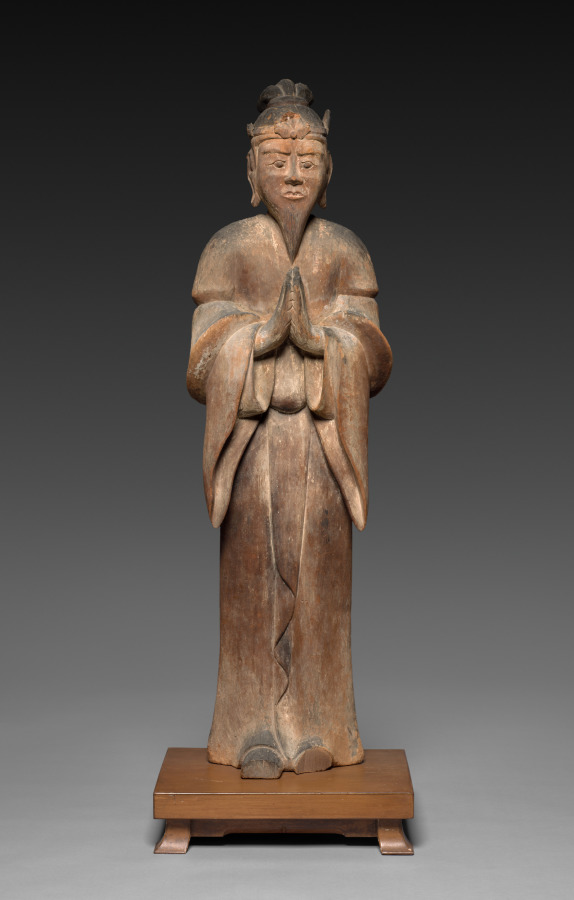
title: Deity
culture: Japan, Heian period (794–1185)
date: 1100s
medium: Magnolia wood with traces of color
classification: Sculpture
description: This unidentified sculpture represents a mature male figure with a long beard. His robes, crown-like head ornament, and hair arranged into a topknot resemble the attire and styling of members of the heavenly realm—tenbu in Japanese—of the Buddhist cosmos. The comparatively simple design, along with carving marks purposely left by the sculptor throughout the surface tend to be associated with sculptures of kami, deities venerated at shrines, or jinja.